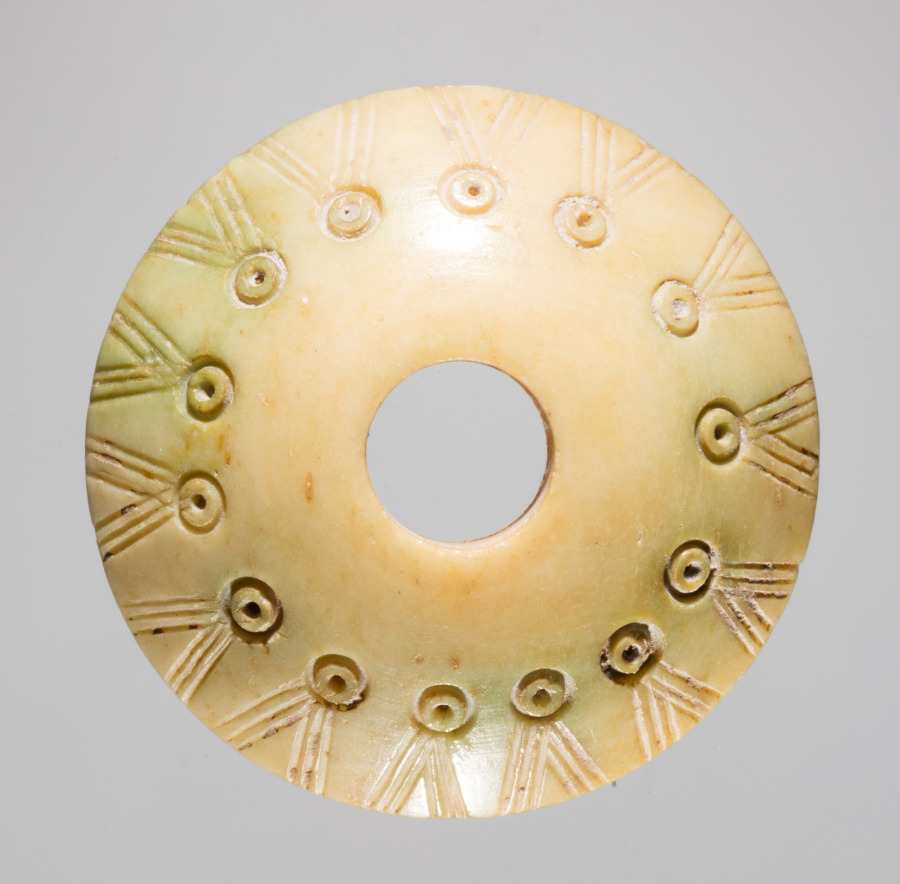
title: Spindle Whorl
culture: Iran, early Islamic period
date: 700s - 900s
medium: bone, incised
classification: Spindle Whorl